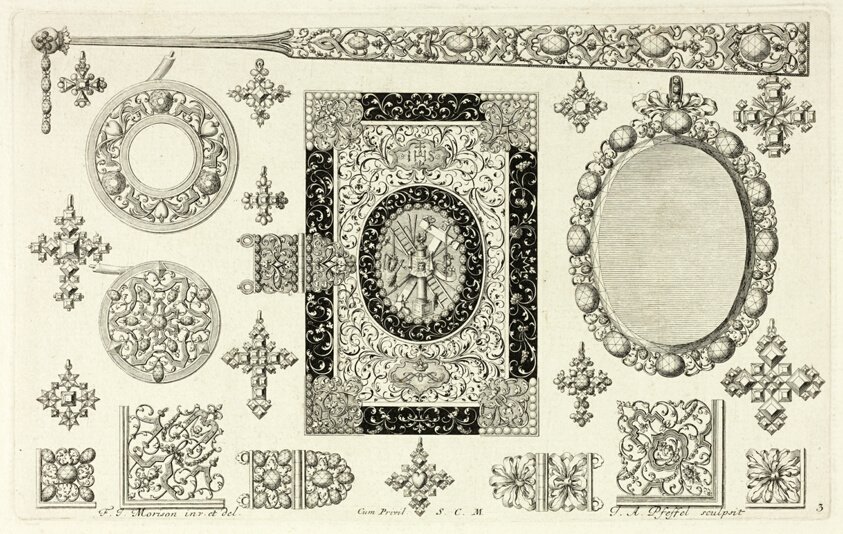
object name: Print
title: Designs for Jewelry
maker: Joannes Andreas Pfeffel I (German, 1674-1748); after Friedrich Jacob Morisson (German, active 1693-1697)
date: before 1697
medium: Engraving on cream laid paper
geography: Germany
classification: engraving; print; prints and drawing